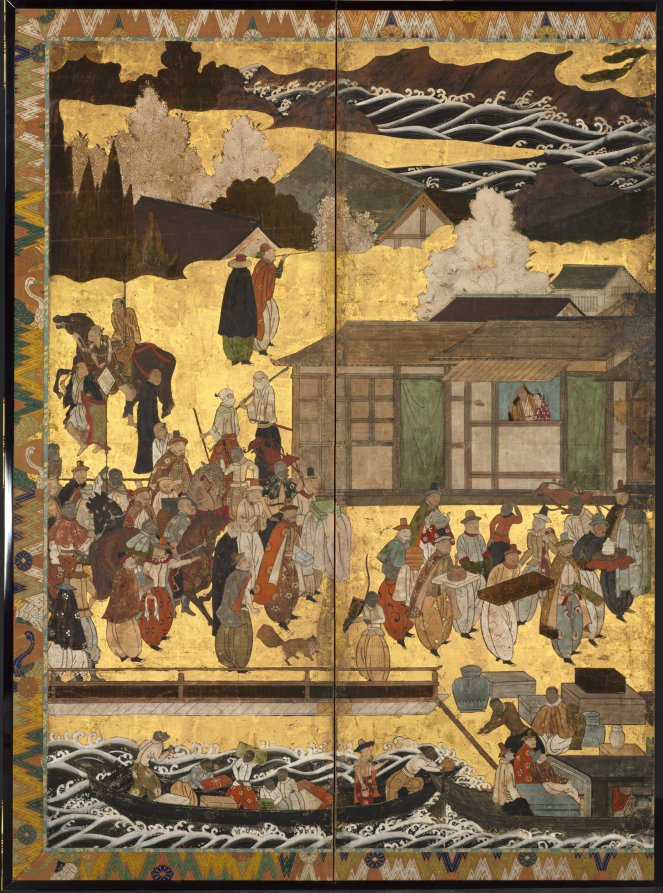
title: Arrival of the "Southern Barbarians"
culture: Japan, Momoyama period (1573–1615)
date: c. 1600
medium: One of a pair of six-panel folding screens; ink, color, and gold on paper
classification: Painting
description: This screen and its corresponding screen show Portuguese merchants arriving in Japan, having crossed the oceans in their large ship with a multinational crew. The Portuguese were known in Japan as the “Southern Barbarians” because they arrived from the south and their customs and manners were unfamiliar to the Japanese, who had not encountered anyone from Europe until their first appearance in 1543. In 1639, the Portuguese were forced out of Japan, mainly owing to internal difficulties caused by their Catholic missionaries, but they were a major conduit for both objects and ideas from Europe for nearly 100 years.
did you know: Europeans were called "Southern Barbarians" because their ships arrived in Japan from the south.